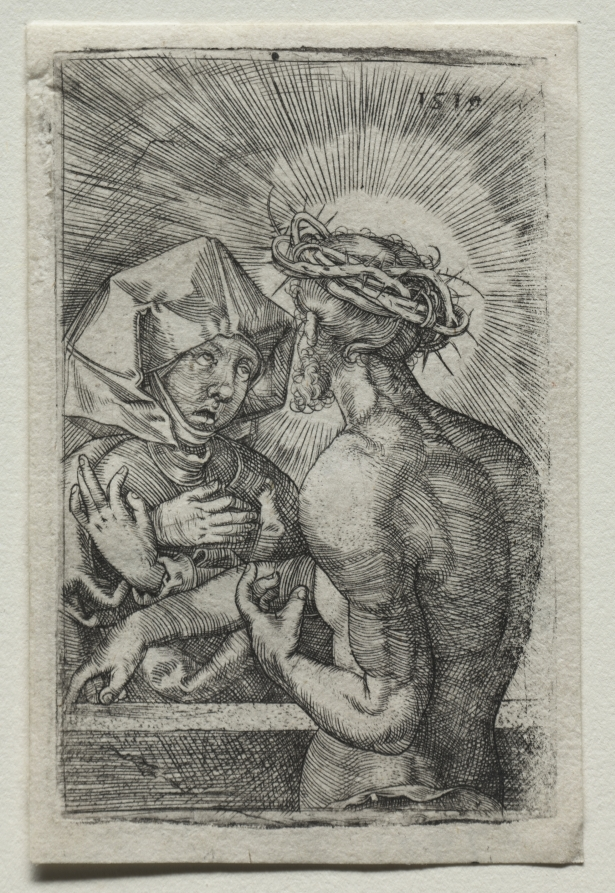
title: Christ and the Virgin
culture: Germany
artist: Hans Sebald Beham (German, 1500–1550)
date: 1519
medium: engraving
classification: Print